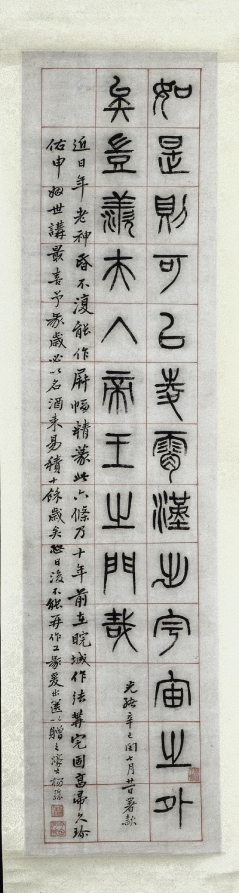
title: On Happiness, Calligraphy in Seal Script Style (zhuanshu)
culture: China, Changsu, Qing dynasty (1644-1911)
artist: Yang Yisun (Chinese, 1813–1881)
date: 1871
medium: hanging scroll, ink on paper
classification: Painting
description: Yang Yisun transcribed this ancient text on six narrow scrolls, starting at the top right and ending at the bottom left. Yang emphasizes the text’s historic nature by using the seal script style found on stone steles and bronze vessels. On Happiness features reflections of a scholar on a leisurely life in the countryside, composed by Han dynasty official Zhongchang Tong, who died the year the Han dynasty collapsed (AD 220). The idyllic life described in the text may bean evocation of the past in a time of national crisis. A decade before Yang wrote these scrolls, Anglo-French forces had looted and burned the Summer Palace in Beijing. At the same time, the domestic Taiping rebellion (1850–64), led by a religious fanatic to overthrow the Qing government, had devastated Yang’s homeland, the Jiangnan region, with an estimated 20 million lives lost.